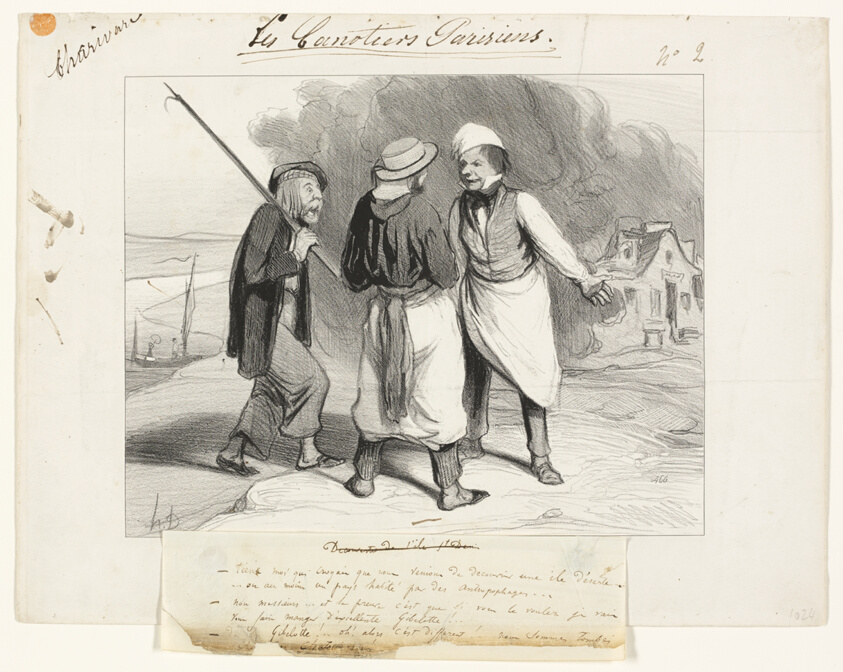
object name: Print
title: Well, fancy that! I thought that we had just discovered a deserted island or at least a country inhabited by cannibals., plate two from Les Canotiers Parisiens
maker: Honoré-Victorin Daumier (French, 1808-1879)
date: 1843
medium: Lithograph in black, with additions in pen and brown ink and caption in pen and brown ink, on ivory wove paper, tipped onto ivory wove paper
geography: France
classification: lithograph; print; prints and drawing